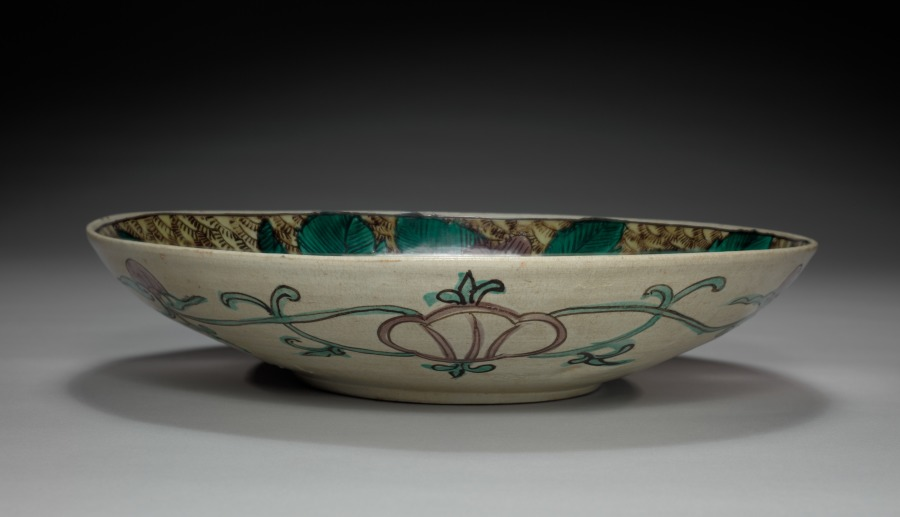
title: Plate with Peonies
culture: Japan, Edo period (1615–1868)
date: early to mid-1800s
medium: porcelain with decoration in overglaze enamels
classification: Ceramic